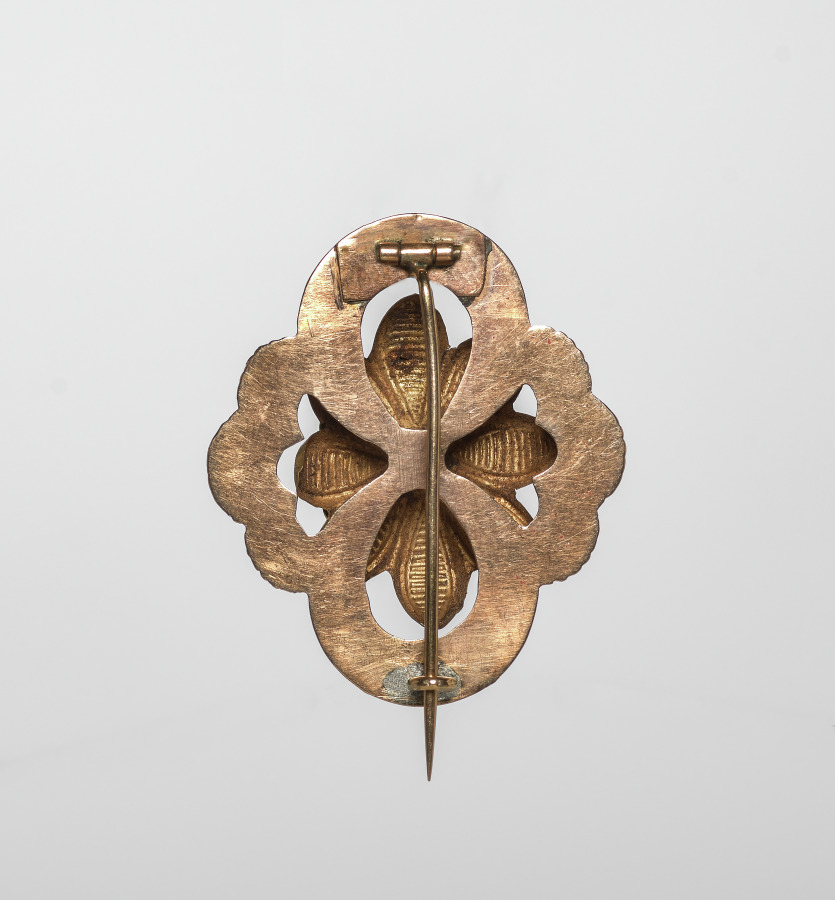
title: Woman's Costume (Brooch)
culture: Italy, 19th century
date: 1800s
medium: gold and jewels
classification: Jewelry